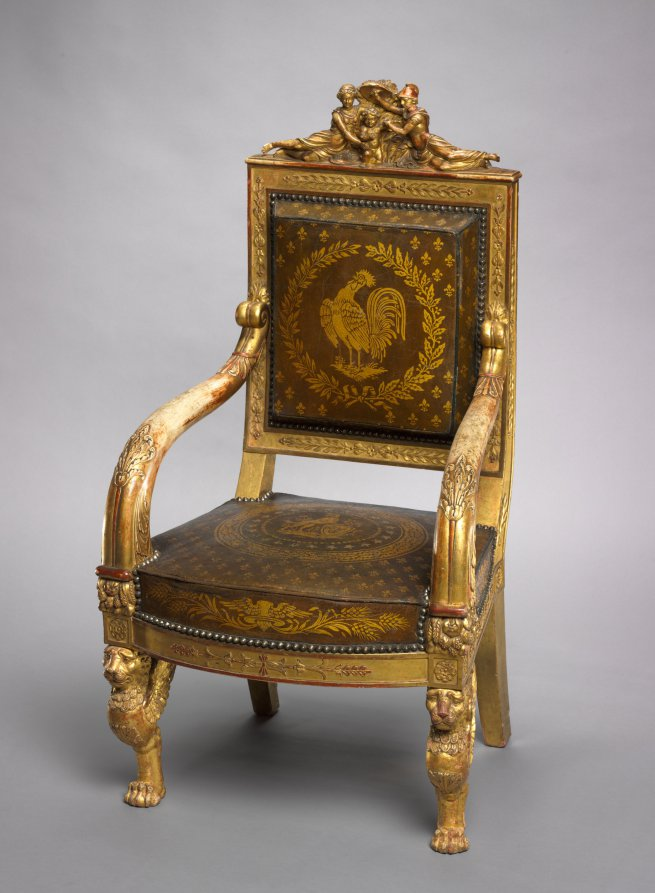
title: Child's Throne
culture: France, Paris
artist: Pierre-Marie Balny le Jeune (French, 1832)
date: 1822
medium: carved and gilded wood, leather upholstery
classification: Furniture and woodwork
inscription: inscribed with stencils inside back rail: BLONDEL TAPISSIER/RUE ST. ANTOINE N 72 1822 inscribed in ink lower edge back rail: 12 JANVIER 18[22?]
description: This chair was made for the young, presumed successor to the French throne who ruled briefly as Henri V in 1830, the last of the direct Bourbon line. He is depicted at the center of the top rail protected by female figures representing France and Minerva, the Roman goddess of wisdom. Fleurs-de-lis and the Gallic rooster, symbols of French royalty and the French people, decorate the upholstery.